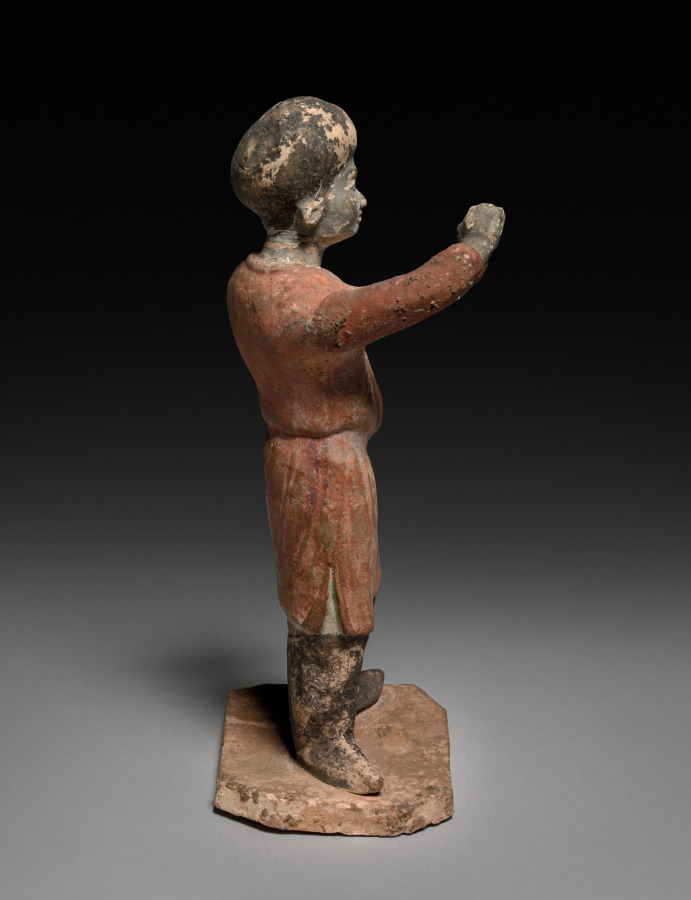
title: Groom (Tomb Figure)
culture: China, Sui dynasty (581-618) - Tang dynasty (618-907)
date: late 500s–early 600s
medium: buff earthenware with polychromy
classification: Sculpture